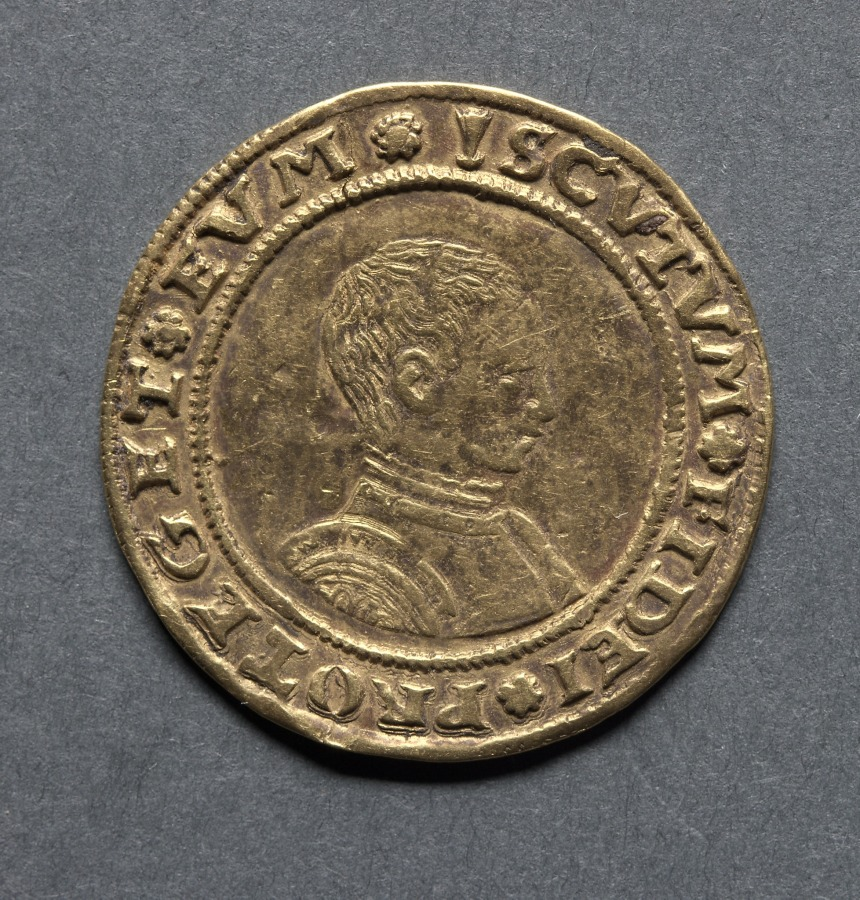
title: Half Sovereign: Edward VI (obverse); Crowned Royal Arms (reverse)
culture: England, Edward VI, 1547-1553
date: 1549–50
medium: gold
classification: Coins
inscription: SCVTM FIDEI PROTEGET EVM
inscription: EDWARD VI D G AGL FRA HIB REX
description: During the first coinage period, April 1547 to January 1549, debased coinage was still issued. Part of it still had the name and portrait of Henry VIII; part of it the name of Henry, but a youthful portrait; and part of it the name of Edward. The series is thus complex and some of the chronology open to doubt. In 1549, the beginning of the second coinage period, the first step was taken to restore the standard of the coinage. Gold, including the piece shown, was struck in 22 ct. This coin shows the young king uncrowned, the only occasion on which the king's portrait is so shown.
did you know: Edward VI's short reign as king of England ended in 1553 when he died at the age of 15.